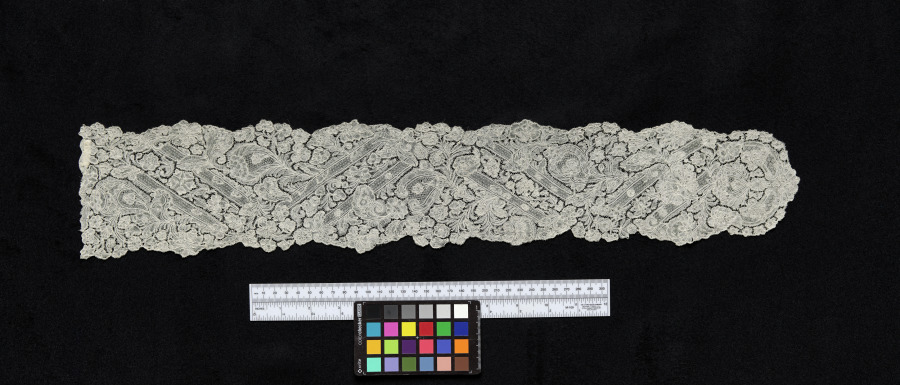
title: Lace Lappet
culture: Flanders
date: 1720–39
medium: Linen: bobbin lace (Point d'Angleterre)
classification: Lace